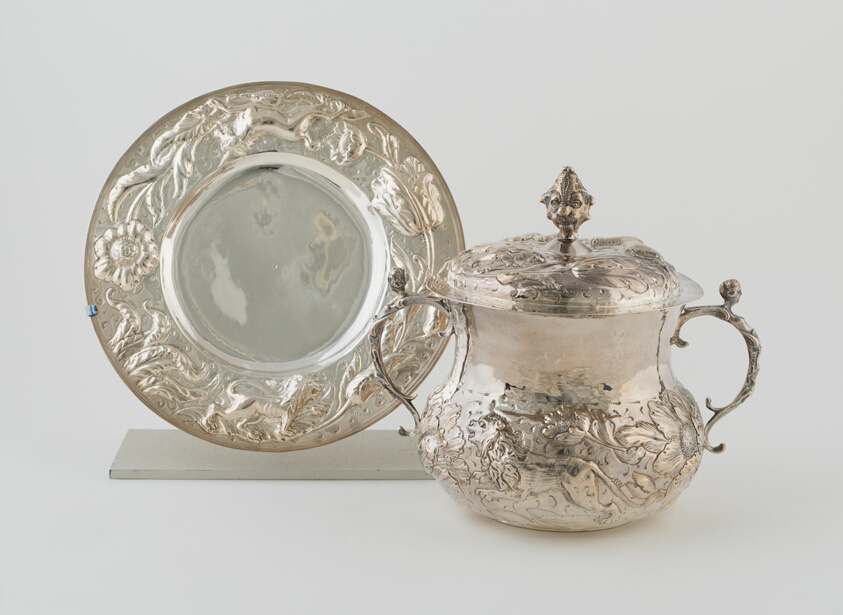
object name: Metalwork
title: Caudle Cup with Cover and Stand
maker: England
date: 19th century (Reproduction); 1664/65 (Original)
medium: Silver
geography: England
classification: drinking vessel; silver; metalwork; european decorative arts